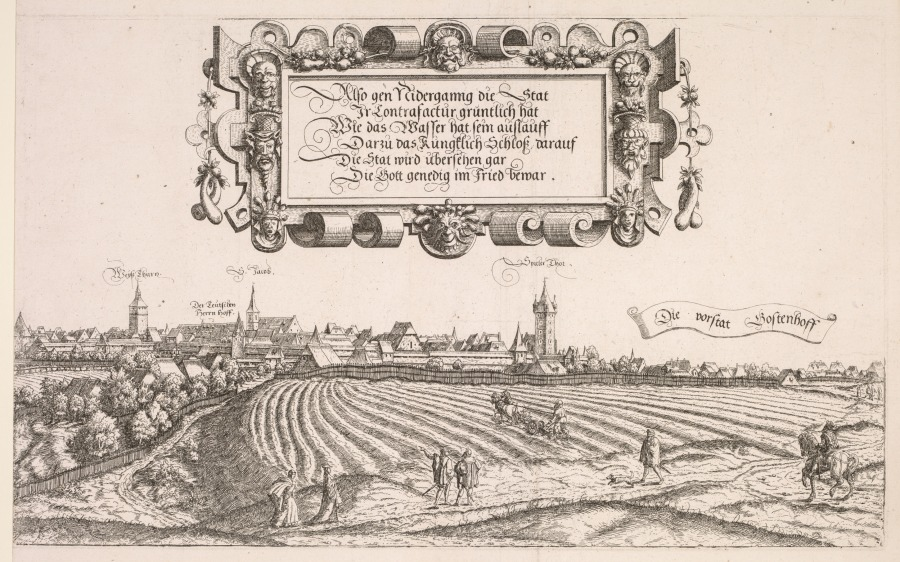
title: Panoramic View of Nuremberg: Right Portion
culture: Germany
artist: Hanns Lautensack (German, 1524–1566)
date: 1552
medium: etching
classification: Print